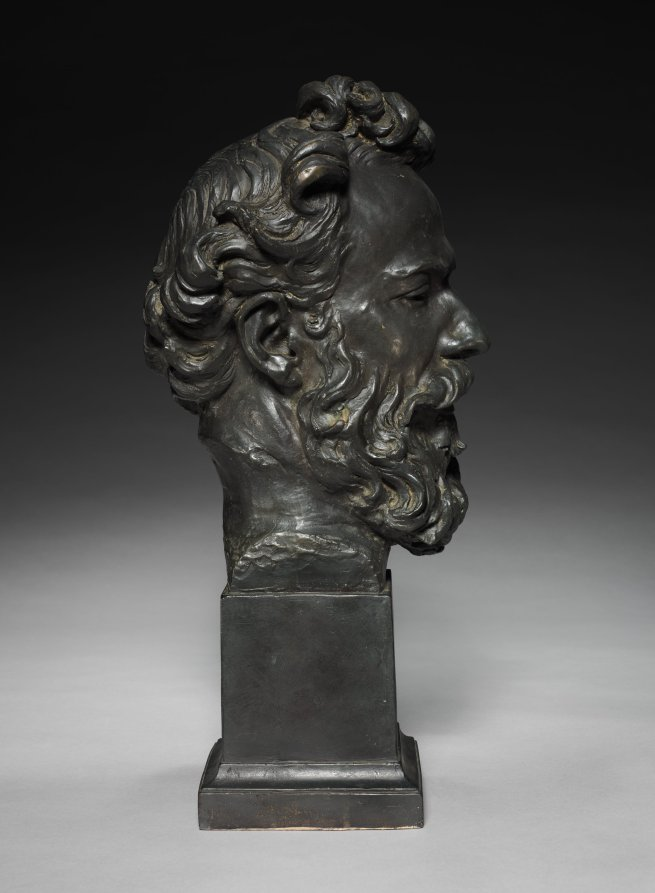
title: Head of Alphonse Legros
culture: France, 19th century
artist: Jules Dalou (French, 1838–1902)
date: c. 1876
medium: bronze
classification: Sculpture